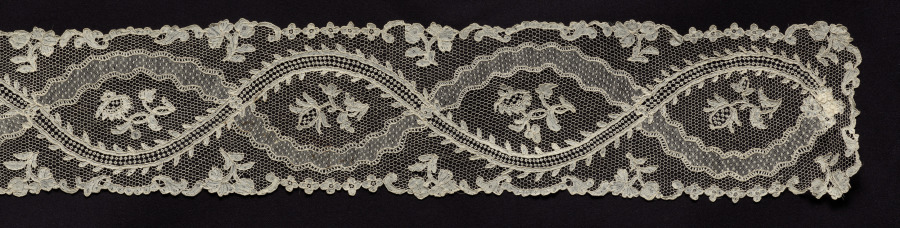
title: Lace Lappet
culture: France, Argentan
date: 1715–74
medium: Linen: needle lace (Point de Argentan)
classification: Lace